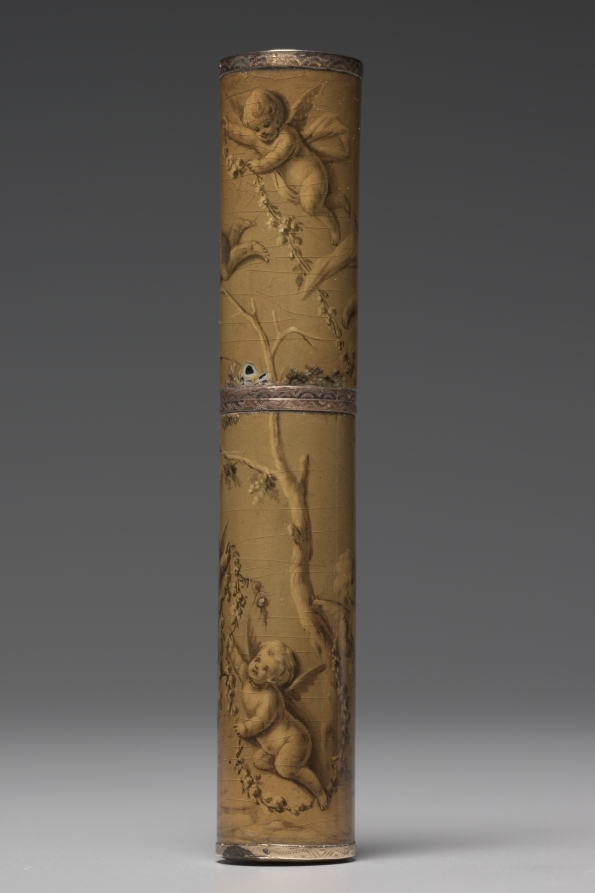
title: Needle Case (Etui à Aiguilles)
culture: France, Paris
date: 1768–69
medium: painted wood, gold mounts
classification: Miscellaneous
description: The material of cases like these delineated the status of the holder. More expensive materials such as ivory, tortoiseshell, or silver were reserved for wealthier users while more common cases were made of lacquered papier-mâché or wood. This wooden case is decorated with vernis martin, a domestic varnish imitating East Asian true lacquer. The sinuous lines, floral garlands, and putti, personifications of love in the form of winged infants, exemplify typical rococo imagery.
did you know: In the 1500s these cases were commonly fabricated to hold pins and needles for master tailors, but became more widely produced for women during the 1700s.